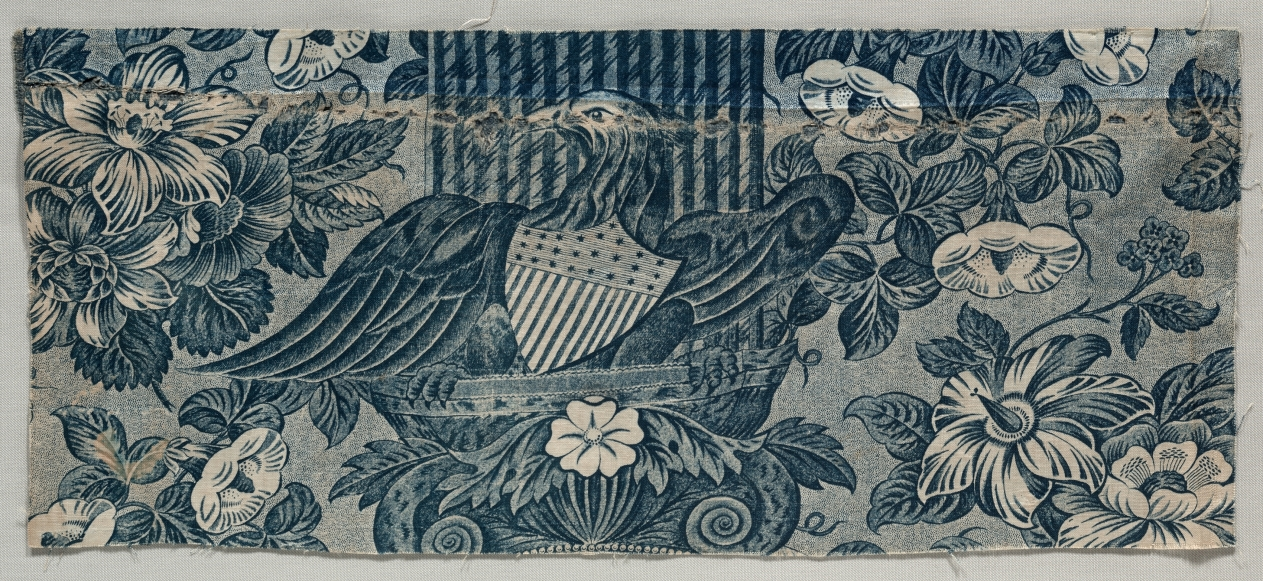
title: Copperplate Printed Cotton Fragment with American Eagle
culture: England, 19th century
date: 1830 – 1840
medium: copperplate printed cotton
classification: Textile